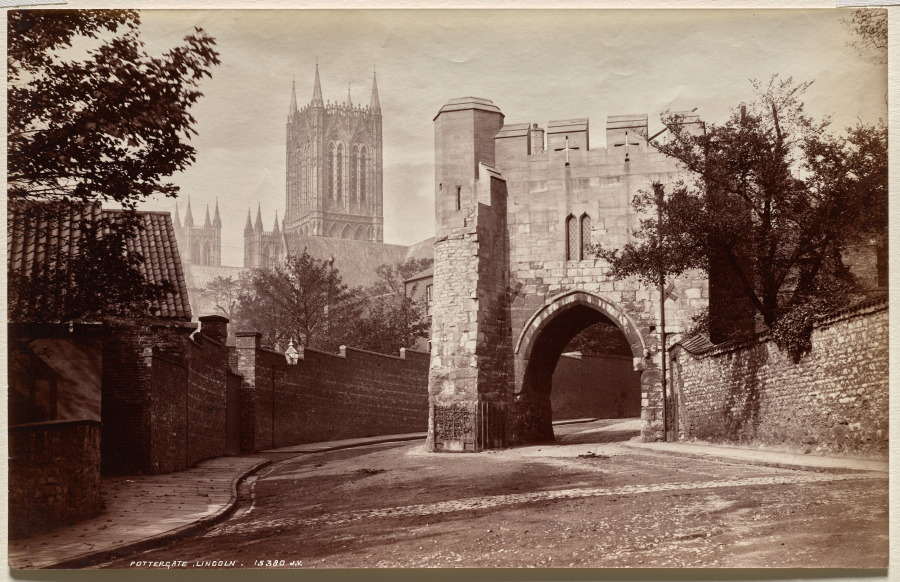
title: Pottergate, Lincoln, England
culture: England, 19th century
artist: James Valentine (British, 1815–1880)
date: c. 1870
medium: albumen print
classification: Photograph